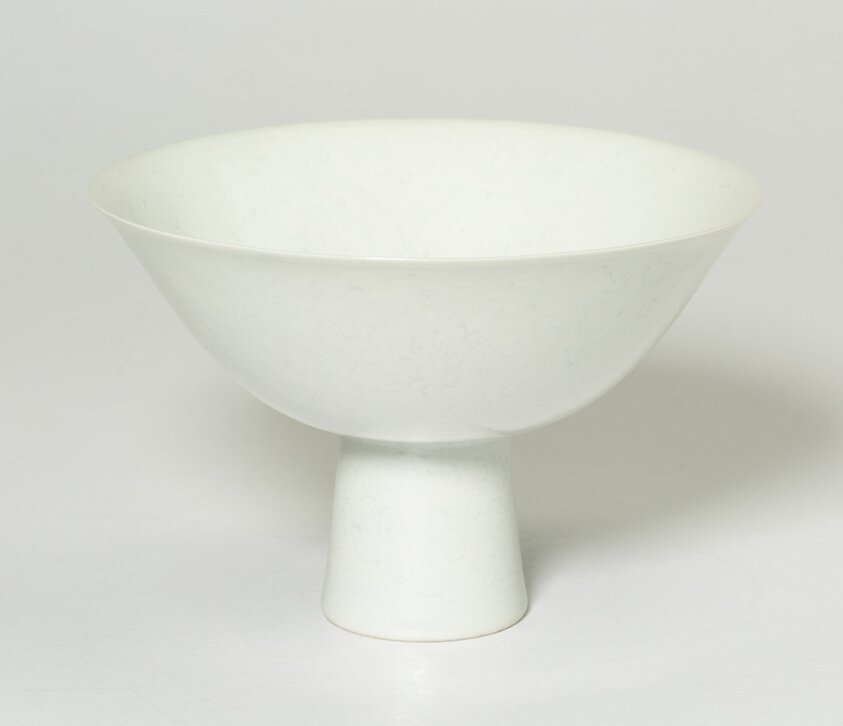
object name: Vessel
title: Stem Cup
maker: China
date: Qing dynasty (1644–1911)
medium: Glazed porcelain with underglaze molded and incised decoration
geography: China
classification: porcelain; ceramics; asian art; vessel